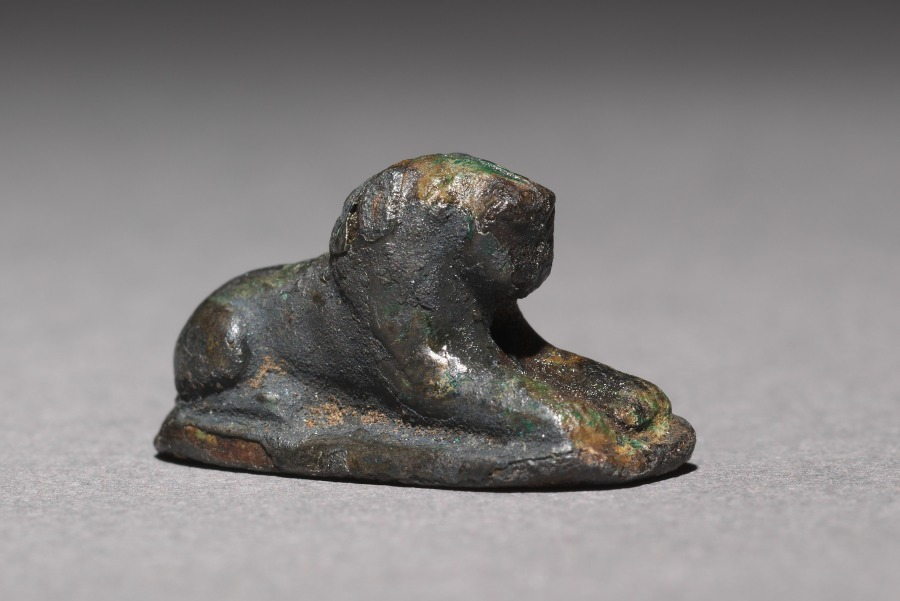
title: Recumbent Lion Beads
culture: Egypt, Middle Kingdom (2040–1648 BCE), Dynasty 12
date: 1980–1801 BCE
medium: silver foil over a clay-bulked resin core (?)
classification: Amulets